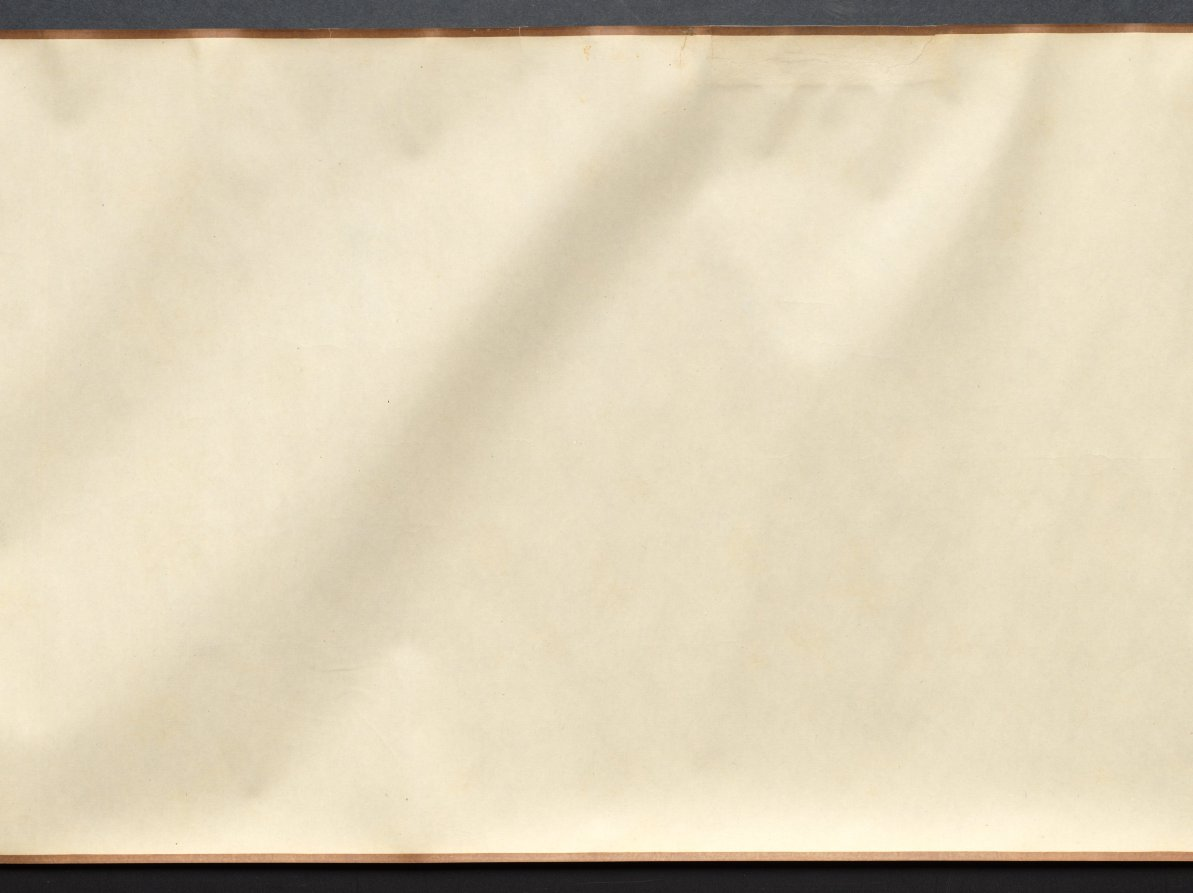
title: Returning to the Village in a Rainstorm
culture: China, Ming dynasty (1368–1644)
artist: Xie Shichen (Chinese, 1487–after 1567)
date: 1530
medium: Handscroll; ink and light color on silk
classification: Painting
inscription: 風雨歸村圖 嘉靖庚寅秋日樗仙謝時臣. [印] 謝時臣印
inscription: 3 additional seals unidentified.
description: This scroll depicts a wind- and rainswept landscape with figures in the countryside struggling against a late summer monsoon rainstorm. Such weather was familiar to residents of the lower Yangzi delta. Xie Shichen spent most of his life in the Suzhou area. Details of his career are scant, but his surviving works suggest that he made his living as a professional painter. This painting conveys drama and anecdotal observations, characteristic of Zhe school paintings, such as the one by Lü Wenying, CMA 1970.76.